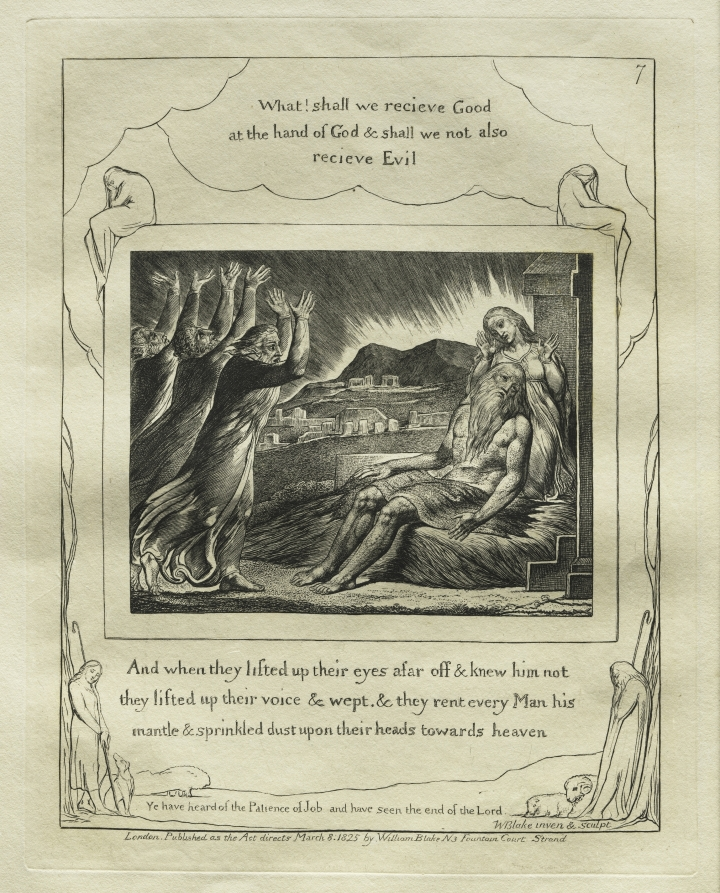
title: The Book of Job: Pl. 7, And when they lifted up their eyes afar off and knew him not / they lifted up their voices and wept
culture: England, 19th century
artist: William Blake (British, 1757–1827)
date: 1825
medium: engraving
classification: Print